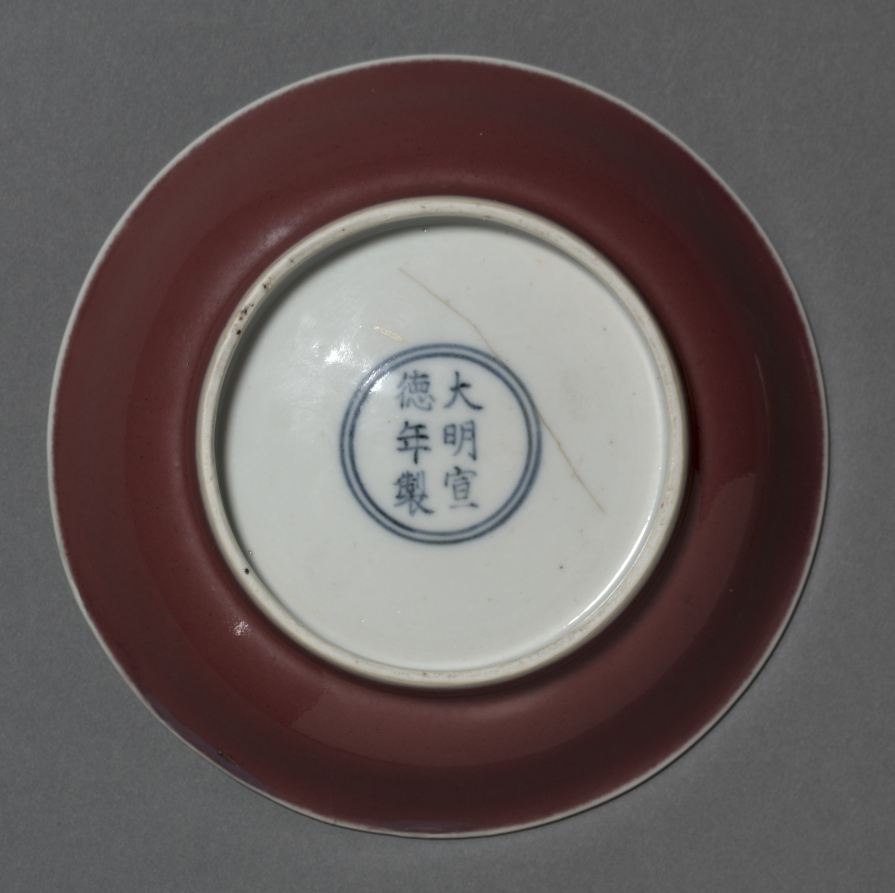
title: Dish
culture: China, Jiangxi province, Jingdezhen, Ming dynasty (1368-1644), Xuande mark and period (1426-1435)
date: 1426–35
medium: porcelain with copper-red glaze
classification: Ceramic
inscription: 大明宣德年製